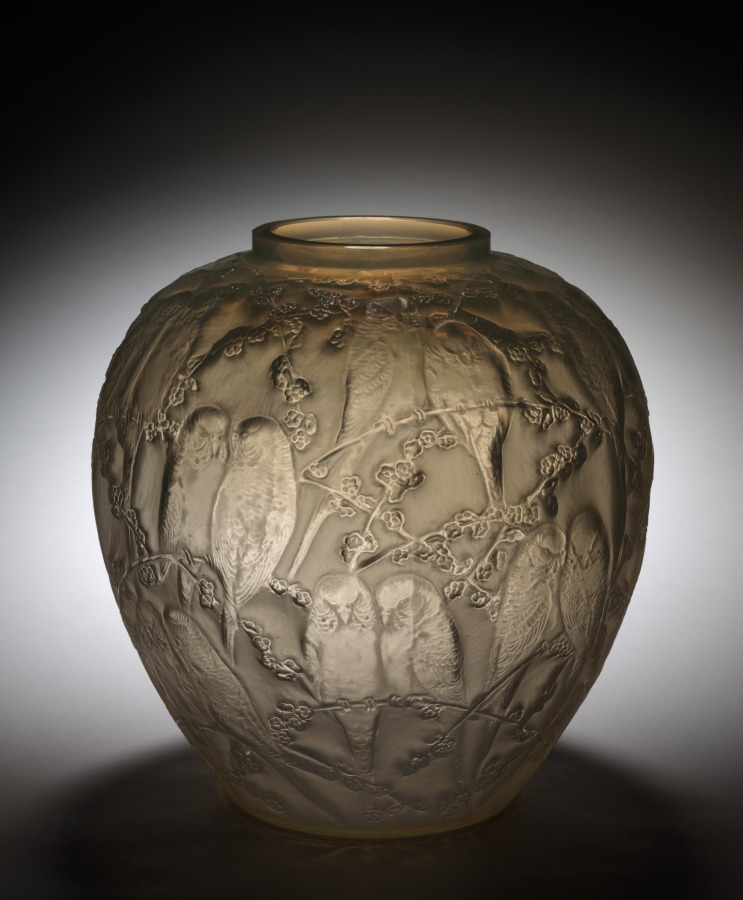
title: Vase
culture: France, 20th century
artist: firm of René Lalique (French, 1860–1945)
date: c. 1930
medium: glass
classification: Glass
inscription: signature from mold on bottom: "R. LALIQUE"; etched on bottom: "FRANCE" and "11594."